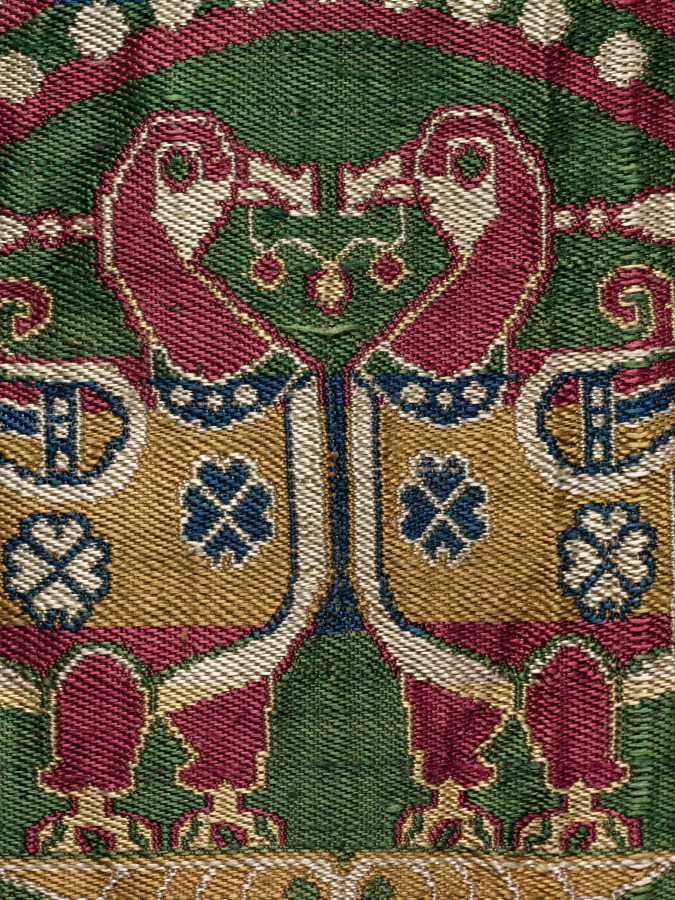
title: Child’s Coat with Ducks in Pearl Medallions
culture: Probably Sogdia (present-day Uzbekistan); China, Tang dynasty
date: 700s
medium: Silk: weft-faced compound twill weave (samite)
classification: Garment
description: The coat’s outer fabric is woven in five brilliant colors featuring paired ducks in pearl roundels, hallmarks of the precious and highly desired silks from Sogdia. The coat’s inner lining is a twill damask with a floral pattern made in China. The combination of Sogdian and Chinese silks in one garment with Tibetan ownership history is evidence of the vital exchange and cultural interaction among the peoples living along the trade routes of the Silk Road. This precious coat was presumably made for a Tibetan prince. Given the coat’s pristine condition, though, it is unclear whether the garment was ever worn, or was used as a diplomatic gift or perhaps as currency.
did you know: This coat is part of a set of garments that originally included an outer pair of pants and silk boots made from the same fabric.